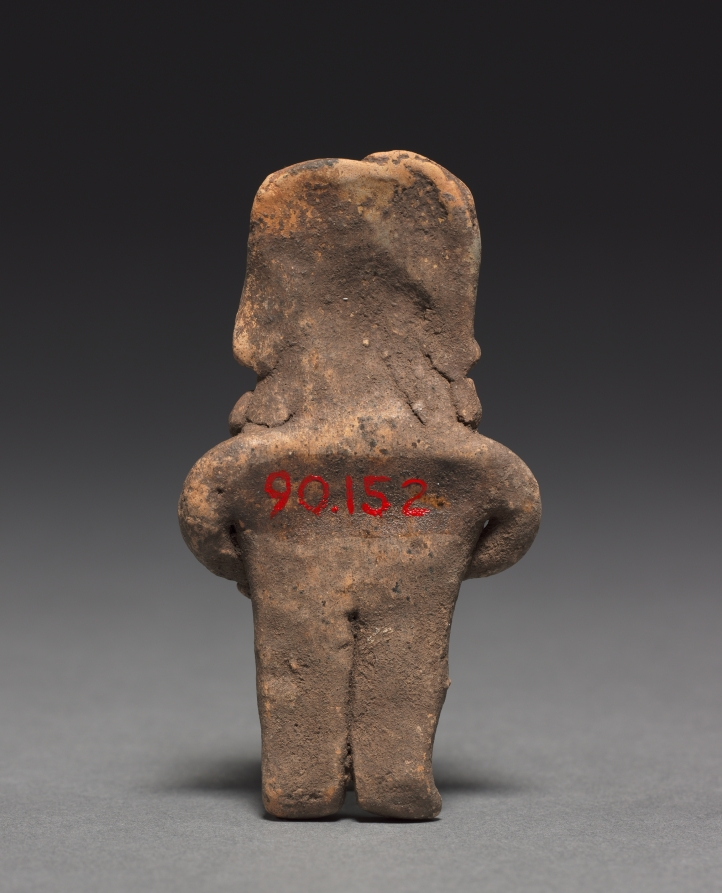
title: Male Figurine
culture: Mesoamerica, Guanajuato or Michoacán, Chupícuaro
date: 400–100 BCE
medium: ceramic, pigment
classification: Sculpture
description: The Chupícuaro culture, located north of Mexico City in the state of Guanajuato, created a distinctive ceramic tradition including small clay figurines. This example is said to belong to a group of ten figurines from the same burial or cache (1990.145–154). The group includes both males and females that can be sorted into couples based on size.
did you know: Groups of figurines were sometimes arranged in scenes and likely used in household rituals.